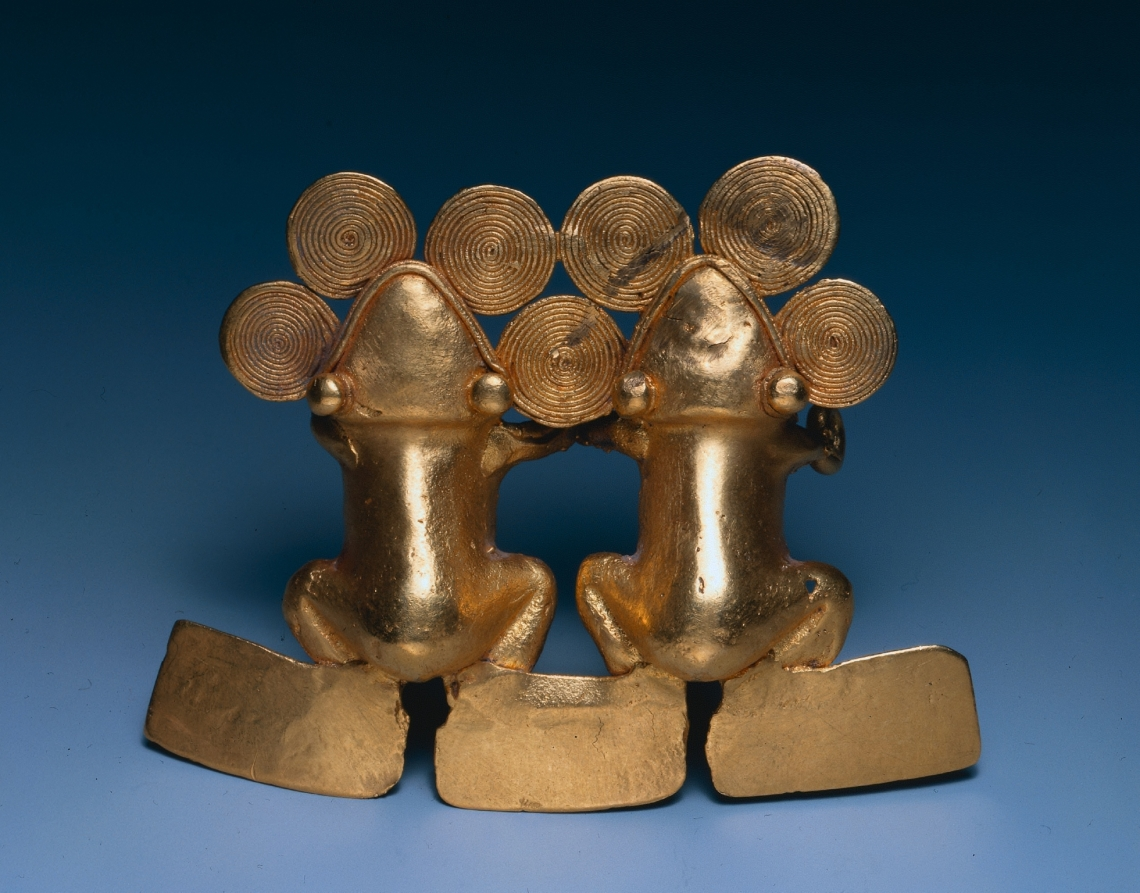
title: Double Frog Pendant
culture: Western Panama, Veraguas-Gran Chiriquí Style, 11th-16th century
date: c. 1000–1550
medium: cast and hammered gold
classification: Metalwork